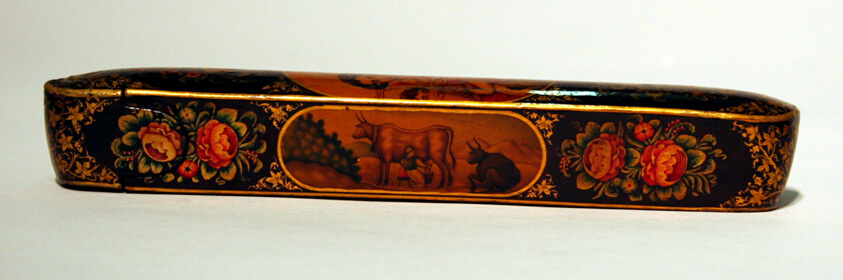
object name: Decorative Arts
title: Pen Box (Qalamdan)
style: Islamic (culture or style)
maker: Iran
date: Qajar dynasty (1796–1925), 19th century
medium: Painted and lacquered papier-mâché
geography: Iran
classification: lacquer; decorative object/ornament; asian art; decorative arts